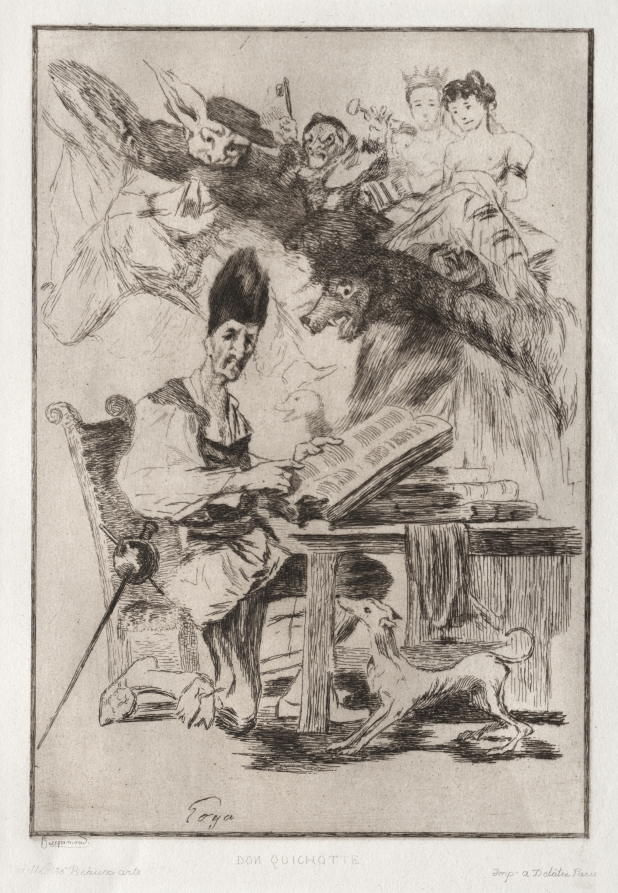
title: Don Quichote, after Goya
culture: France, 19th century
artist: Félix Bracquemond (French, 1833–1914)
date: 1860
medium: etching in brown ink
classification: Print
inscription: in lower margin, printed: Bracquemond / Gazette-des-Beaux Arts / Don Quichotte/ Imp. A Delâtre Paris